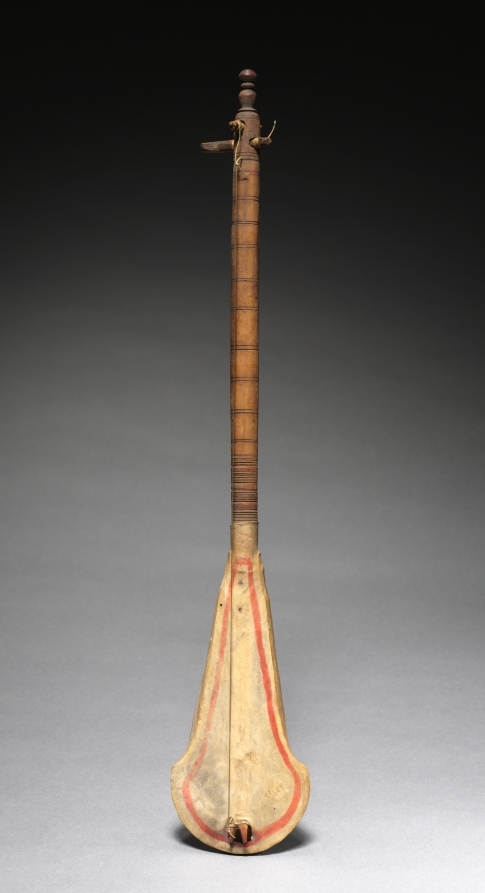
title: Gimbri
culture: Africa, unknown maker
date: 1900s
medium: Wood, rawhide, and string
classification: Musical Instrument